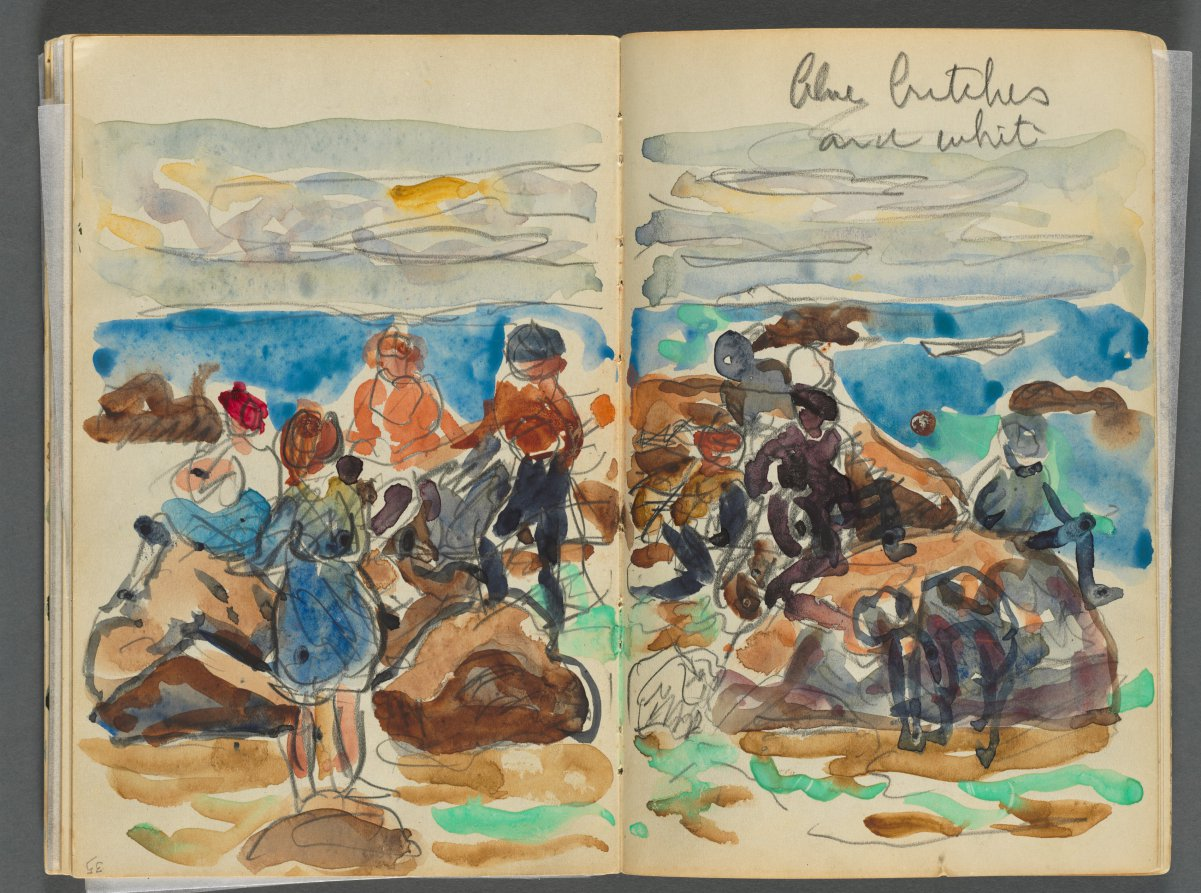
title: Sketchbook- The Granite Shore Hotel, Rockport, page 034 & 35: Children on a Beach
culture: America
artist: Maurice Prendergast (American, born Newfoundland [now Canada], 1858–1924)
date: 1905–10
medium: graphite and watercolor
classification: Bound Volume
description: This sketchbook contains 72 pages of pencil drawings and 9 watercolors of Cape Ann. On the inside of the cover Prendergast wrote the address of the Granite Shore Hotel in Rockport, Massachusetts.